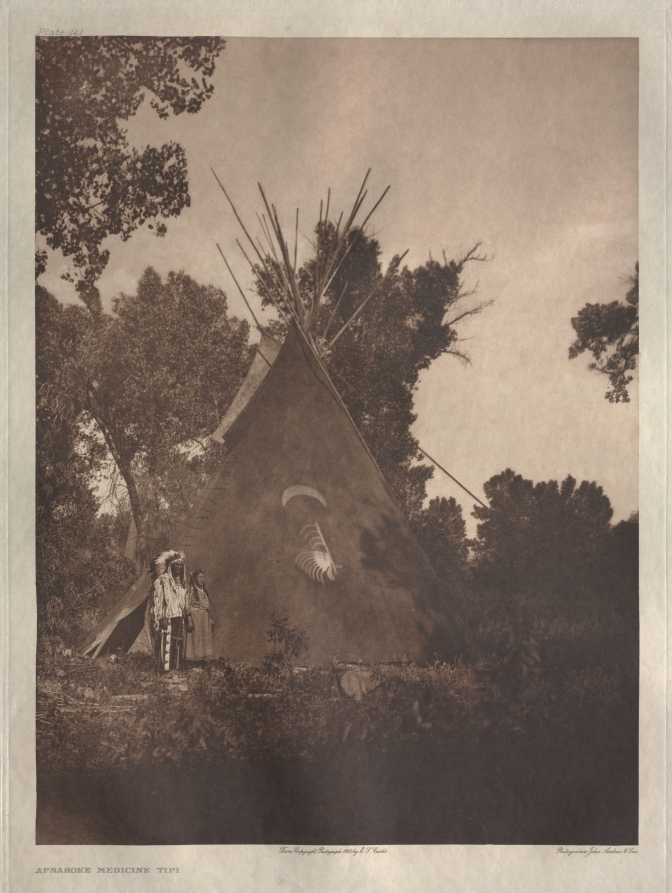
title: Portfolio IV, Plate 141: Apsaroke Medicine Tipi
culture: America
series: The North American Indian: being a series of Portfolios picturing and describing the Indians of the United States, the Dominion of Canada, and Alaska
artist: Edward S. Curtis (American, 1868–1952)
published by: The University Press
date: 1905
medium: photogravure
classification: Portfolio